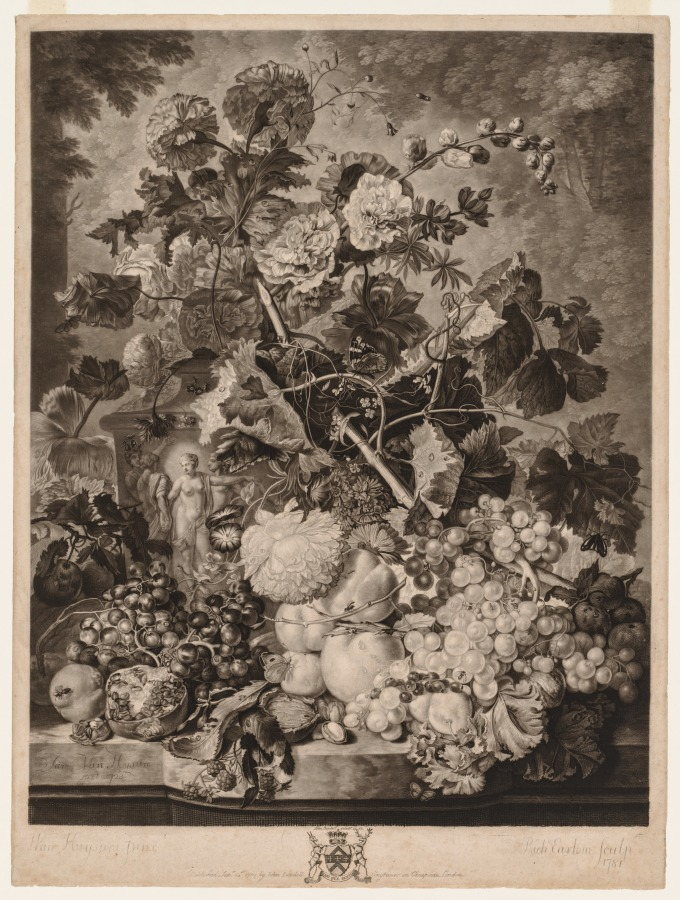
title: A Fruit Piece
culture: England, 18th century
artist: Richard Earlom (British, 1743–1822)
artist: after Jan van Huysum (Dutch, 1682–1749)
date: 1781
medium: mezzotint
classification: Print